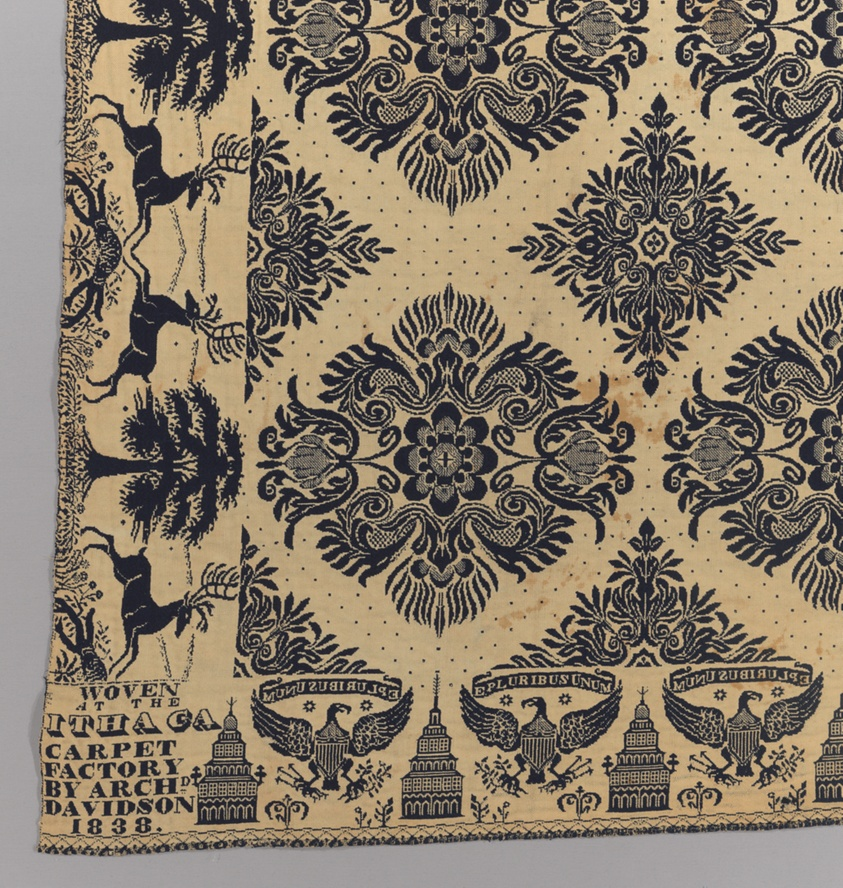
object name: Textile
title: Coverlet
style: 19th century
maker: Archibald Davidson (American, born Scottish, active 1832-1848); United States, New York, Tompkins County, Ithaca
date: 1838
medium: Cotton and wool, plain weave double cloth; woven on loom with Jacquard attachment; two loom widths joined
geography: New York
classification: weaving - coverlet; coverlet; weaving; textile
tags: medallions, arrows, united states of america, animals, dots, buildings, foliage, tulips, flowers, trees, deer, eagles, coverlet